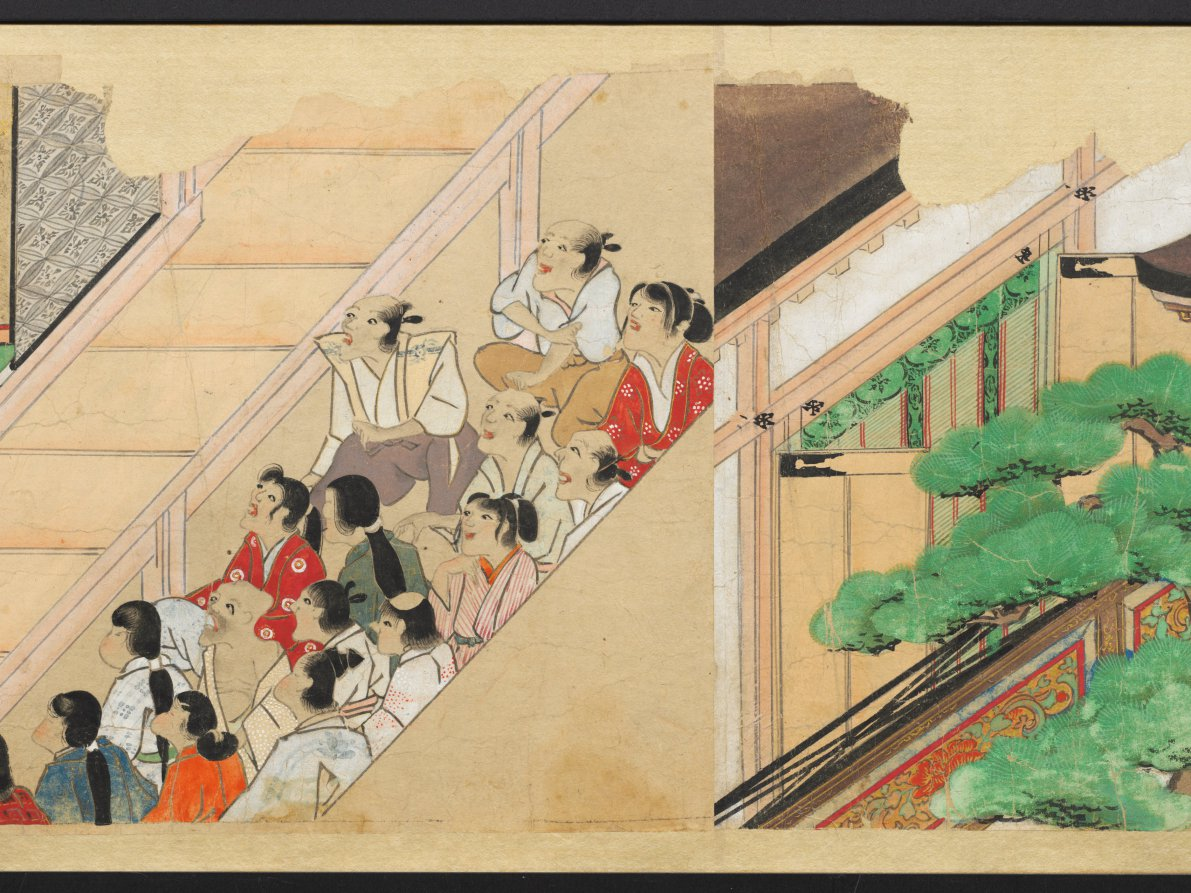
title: The Saltmaker's Story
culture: Japan, Edo period (1615–1868)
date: early 1600s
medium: One of a pair of handscrolls; ink, color, and gold on paper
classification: Painting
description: Once read and copied by girls at New Year’s celebrations and included in dowries, The Saltmaker’s Story is a rags-to-riches tale in which daughters are gifts from the gods. Despite his simple outlook, the main character progresses from humble roots as an associate at Kashima Shrine to the elite status of grandfather of the emperor through the intervention of the Kashima deity. The Saltmaker’s Story is traditionally presented in a set of three scrolls, but the text of this set has been removed by a previous owner, who remounted the illustrations as a pair. The paintings of this one take us from right to left through the second half of the tale.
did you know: This handscroll originally had texts before its paintings, but the texts were removed.